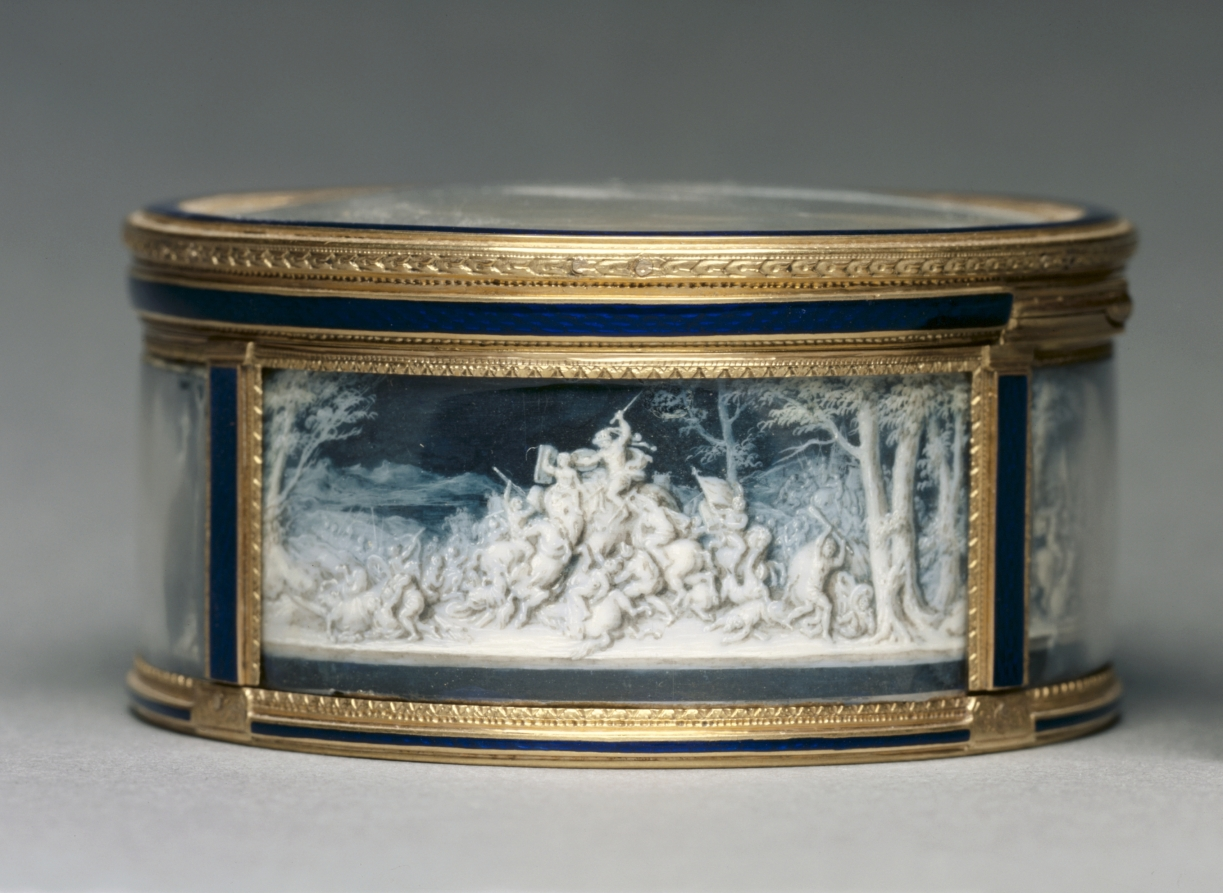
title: Snuff Box (Tabatière)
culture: France, 18th century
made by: Pierre Marie Gault De Saint-Germain (French, 1754–1842)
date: 1779–80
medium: gold and enamel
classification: Miscellaneous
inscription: [Warden's mark for Paris, 1779-1780, inside bottom; inside cover]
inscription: [Illegible maker's mark, inside bottom; inside cover]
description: Decorated with images derived from ancient Greek and Roman history in the style of cameos, intricately carved gemstones, this box evokes the rising neoclassical imagery in France. The scenes on the box recount several key events in the life of Alexander the Great. The enameled works were inspired by a series of prints by Sébastien Leclerc which drew from a series of paintings by Charles Le Brun.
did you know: The original series painted by Charles Le Brun, The Battles of Alexander (Les Batailles d’Alexandre) (1600s), was commissioned by King Louis XIV of France.